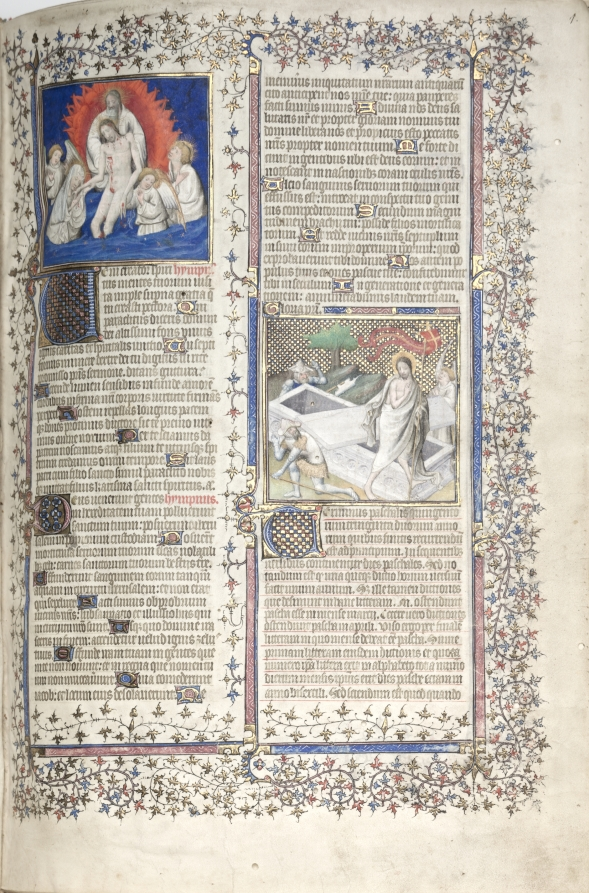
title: The Gotha Missal: Fol. 1r, Trinity and Resurrection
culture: France, Paris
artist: Master of the Boqueteaux (French)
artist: and Workshop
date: c. 1375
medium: ink, tempera, and gold on vellum; blind-tooled leather binding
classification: Bound Volume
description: The style and quality of this manuscript's decoration is typical of deluxe Parisian books made for aristocratic or royal patrons. Most of the book's decoration appears to be the work of the Master of the Boqueteaux, an artist active at the court of King Charles V (died 1380). His style was apparently shared by a number of book illuminators working in and around Paris. It is very possible that the Gotha Missal belonged to Charles V, but is not provable because the manuscript has no royal portraits and lacks a colophon. Given the book's magnificent decoration, however, it would seem that it was produced for a Valois prince, if not for the king himself. The manuscript receives its name from the German dukes of Gotha, its later owners.